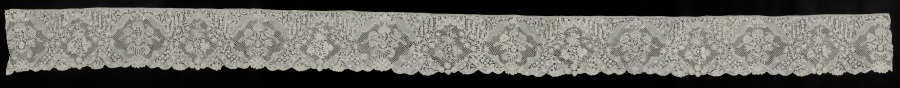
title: Lace Flounce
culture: Belgium, Brabant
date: 1600s–1700s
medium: Linen: bobbin lace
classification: Lace